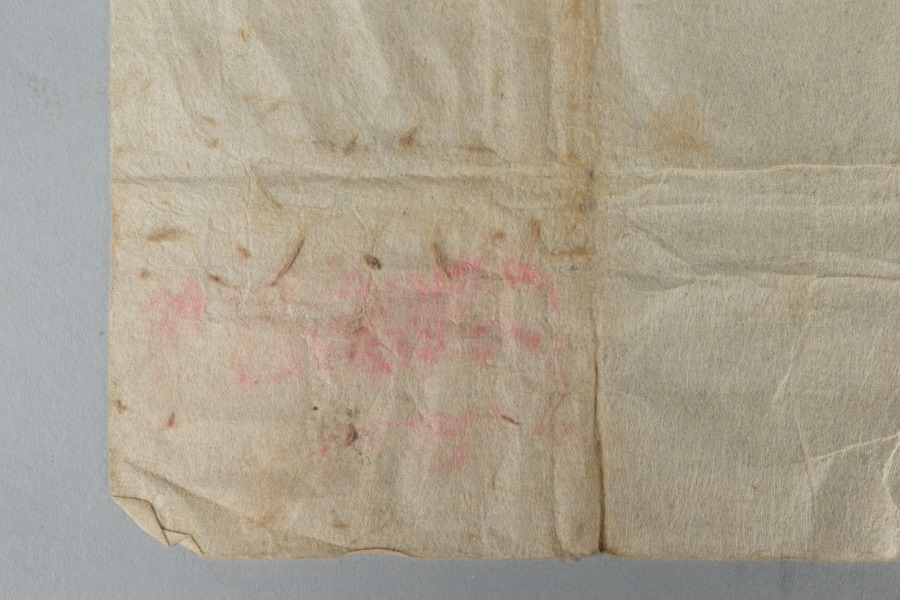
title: Happy Forest, from Water Margin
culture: Japan, Edo period (1615–1868)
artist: Matsumura Goshun (Japanese, 1752–1811)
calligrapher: and Amenomori Shōteki (Japanese, 1731–1786)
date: late 1700s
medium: hanging scroll; ink and color on paper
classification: Painting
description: The Chinese literary classic Water Margin is set in the 1120s and tells the story of 108 outlaws who first rebel against the government and then join forces with it. This painting depicts an episode in which hero Wu Song reclaims the tavern Happy Forest for its rightful owner, the prison warden’s son, Shi En. To prepare for the fight, Wu Song drinks a lot of wine. The painting was inscribed with a quote in which an ally describes Wu Song’s fighting style. It reads as follows: Where his twin fists rise, clouds and thunder roar, When his flying kick comes, wind and rain tremble.